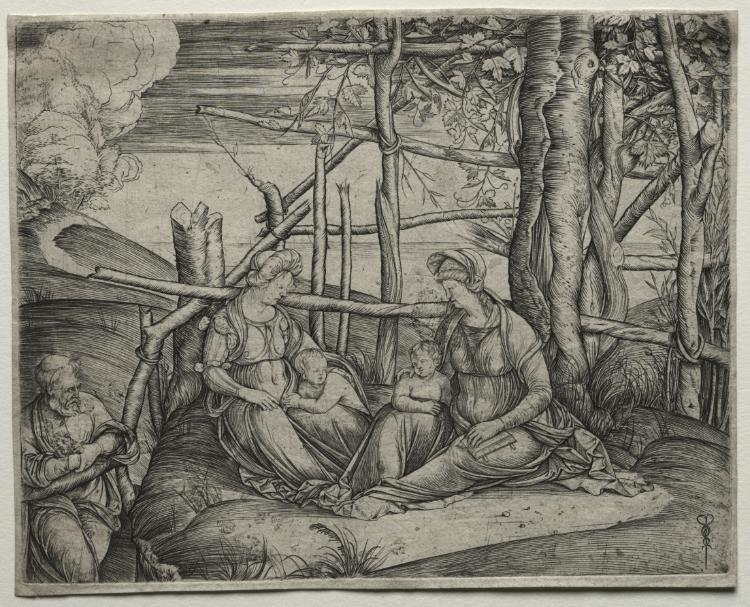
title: The Holy Family with Saint Elizabeth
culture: Italy, 16th century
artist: Jacopo de' Barbari (Italian, c. 1460/70–c. 1516)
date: c. 1503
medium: engraving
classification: Print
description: While this landscape might seem desolate and strange, it is rife with religious symbolism. The Virgin Mary and Christ on the right sit with Mary’s cousin, Saint Elizabeth, and her son, Saint John the Baptist. The Bible describes Elizabeth as past childbearing age; both she and Mary were granted virgin births by God. The barren trees, therefore, signify Elizabeth’s infertility, while the fencelike enclosure denotes the enclosed garden of virginity. The trees also remind viewers of Eve’s sin in the Garden of Eden. Jacopo de’ Barbari placed lively grapevines on the dying trees, a metaphor for Christ.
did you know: Before scholars identified all the works of Jacopo de' Barbari by name, he was called "Master of the Caduceus" for the symbol of a Mercury's staff with which he often signed his prints, seen here at lower right.